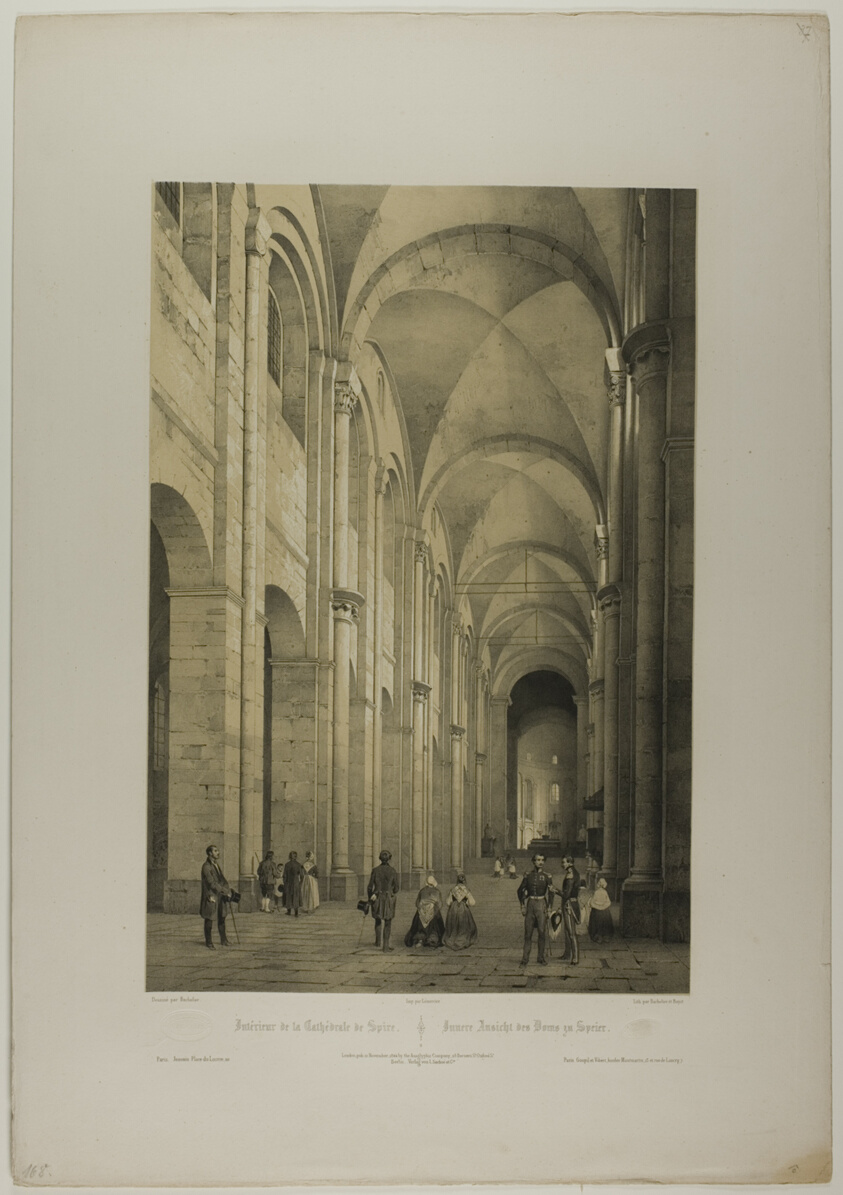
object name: Print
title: Interior of the Cathedral of Speier, plate eleven from Allemande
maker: Charles-Claude Bachelier (French, 19th century) and Buyot (French, active 1848); after a drawing by Charles-Claude Bachelier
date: 1844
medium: Lithograph from two stones on white wove paper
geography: France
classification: lithograph; print; prints and drawing